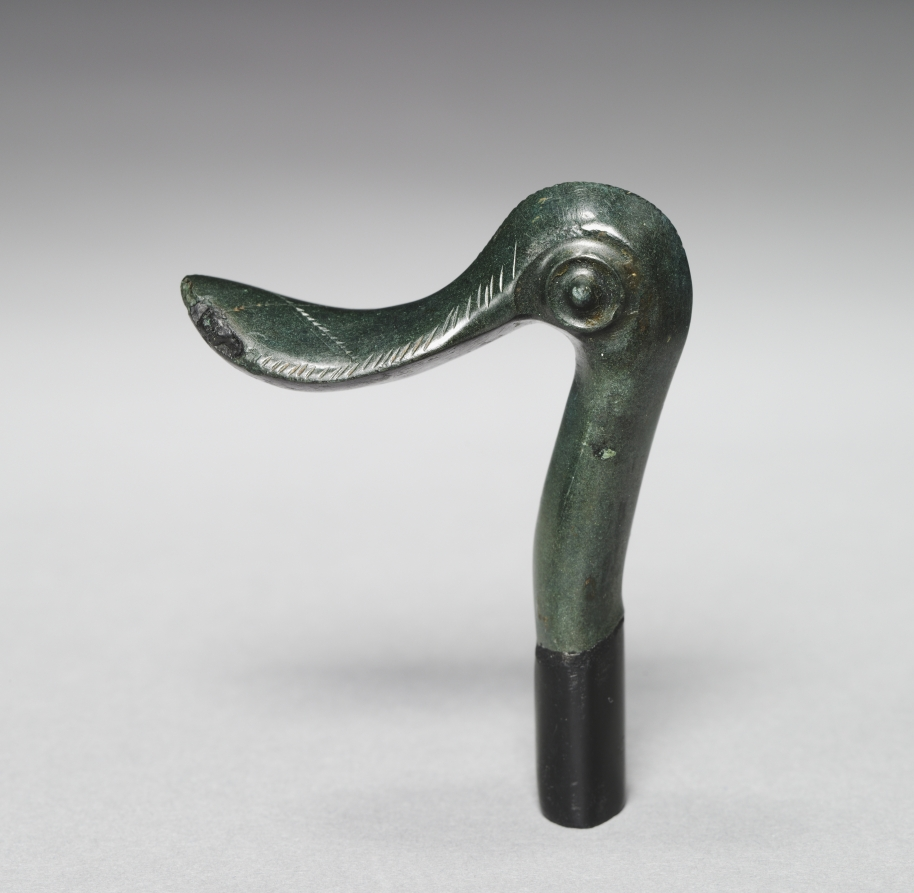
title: Duck Head Finial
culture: possibly Hungary, Bronze Age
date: c. 1400–1300 BCE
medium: bronze, cast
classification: Sculpture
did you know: A decorative object, this duck head finial likely topped a piece of furniture.